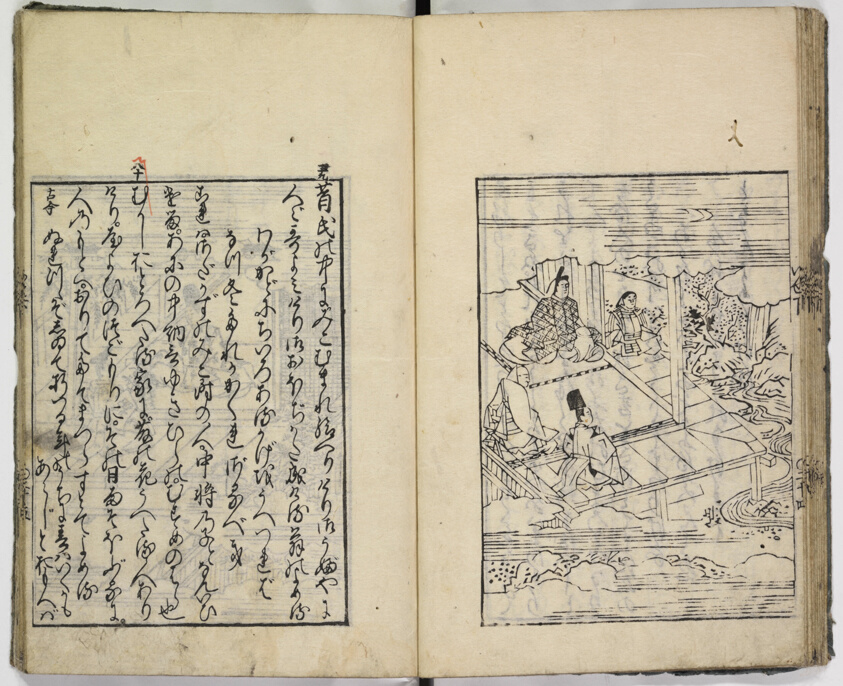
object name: Book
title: Tales of Ise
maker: Artist unknown, Japanese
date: 1660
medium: Woodblock-printed book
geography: Japan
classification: book